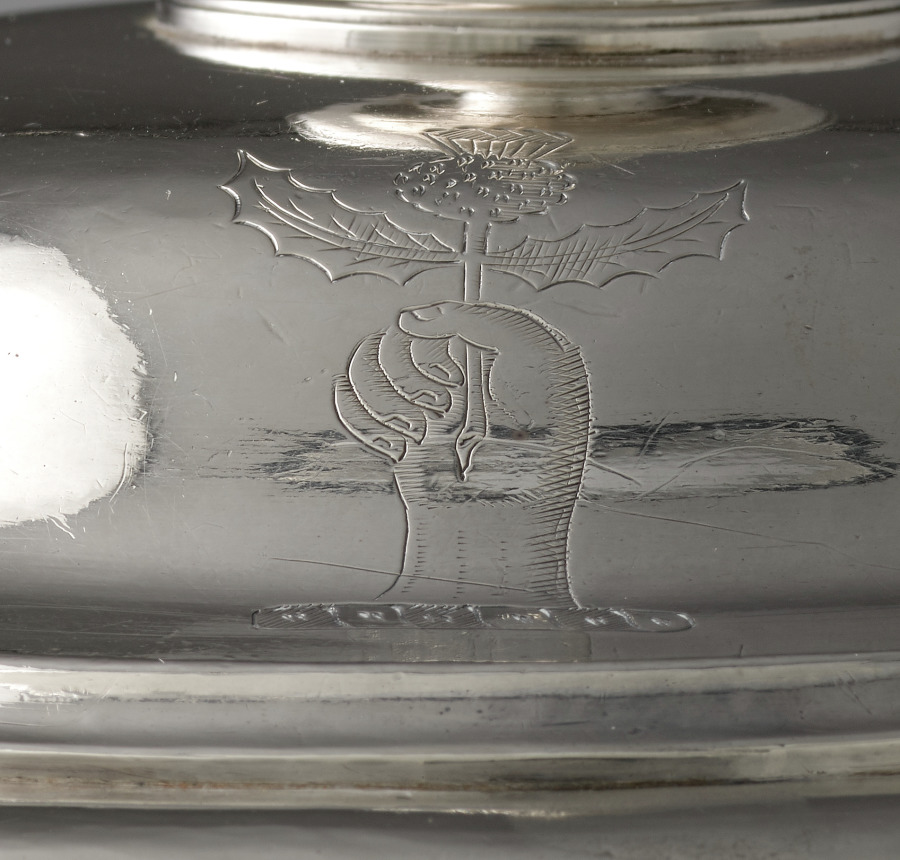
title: Two-Handled Cup (lid)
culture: England, London, 18th century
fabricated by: Anthony Nelme (British)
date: 1712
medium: silver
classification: Silver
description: Nelme was one of the most famous and successful native English silversmiths of a time when Huguenots (French Protestants) dominated the creation of richly decorated pieces for the most fashionable market.